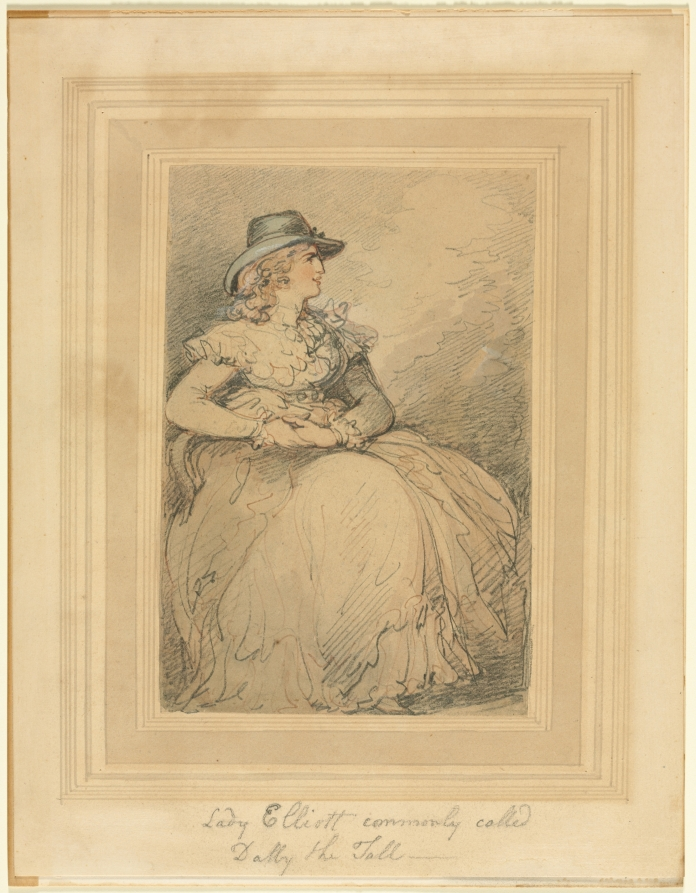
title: Lady Elliott, Commonly Called Dolly The Tall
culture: England, 18th century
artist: Thomas Rowlandson (British, 1756–1827)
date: 1775–1827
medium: graphite, pen and brown ink, and watercolor, heightened with traces of white gouache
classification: Drawing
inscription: Lower center, in graphite: "Lady Elliott commonly called / Dolly the Tall--"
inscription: Verso, lower right, in graphite: "[1/2?] [Imb?] [Plusi?]"